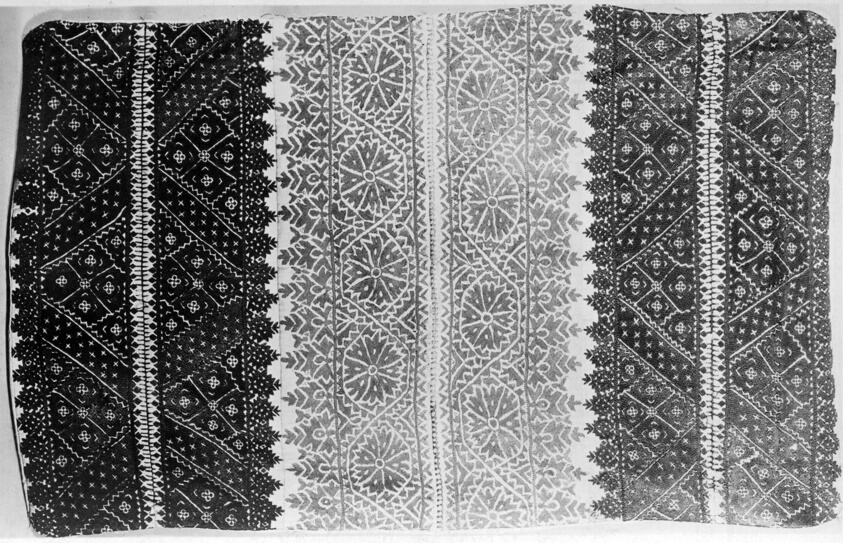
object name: Textile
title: Fragments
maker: Morocco, Fès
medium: Silk, plain weave; embroidered in stem, herringbone, plaiting, and Holbein stitches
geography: Morocco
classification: textile; needlework (visual works)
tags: morocco